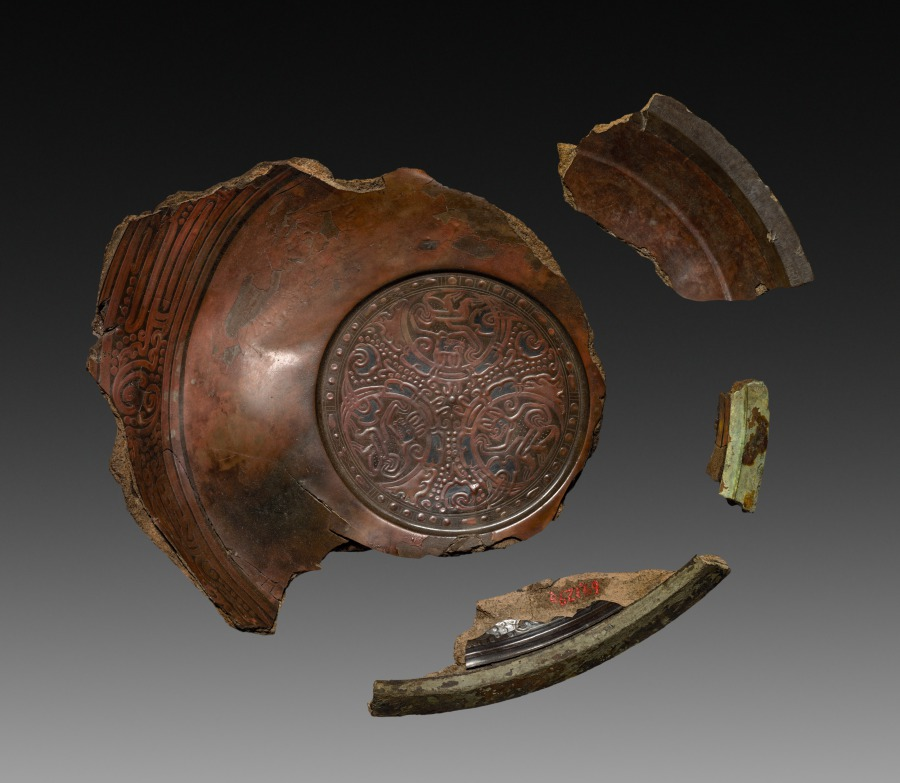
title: Fragments of a Lacquer Tray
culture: China, excavated at Lolang, Xin dynasty (9–23 CE)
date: 9 CE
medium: lacquer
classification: Lacquer